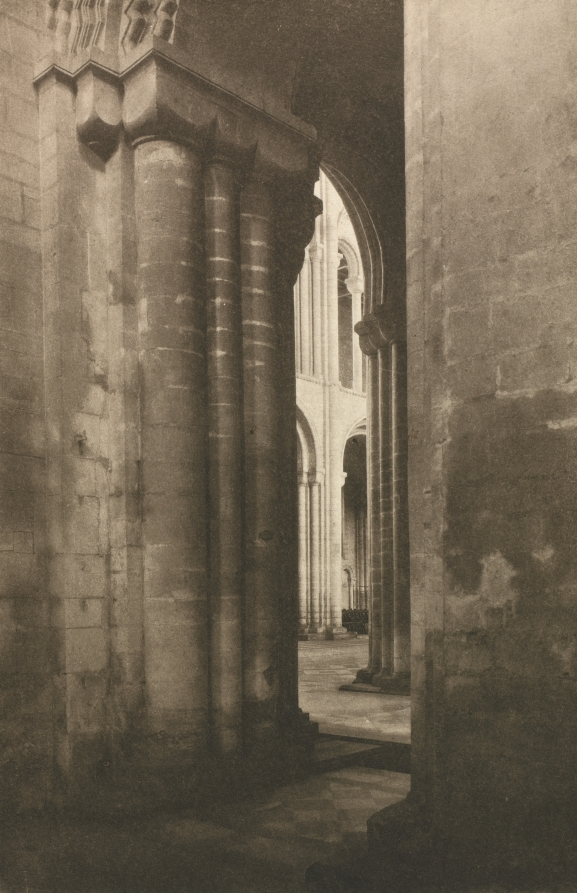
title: Camera Work: Ely Cathedral: A Memory of the Normans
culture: England, 20th century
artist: Frederick H. Evans (British, 1853–1943)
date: 1903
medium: photogravure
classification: Bound Volume